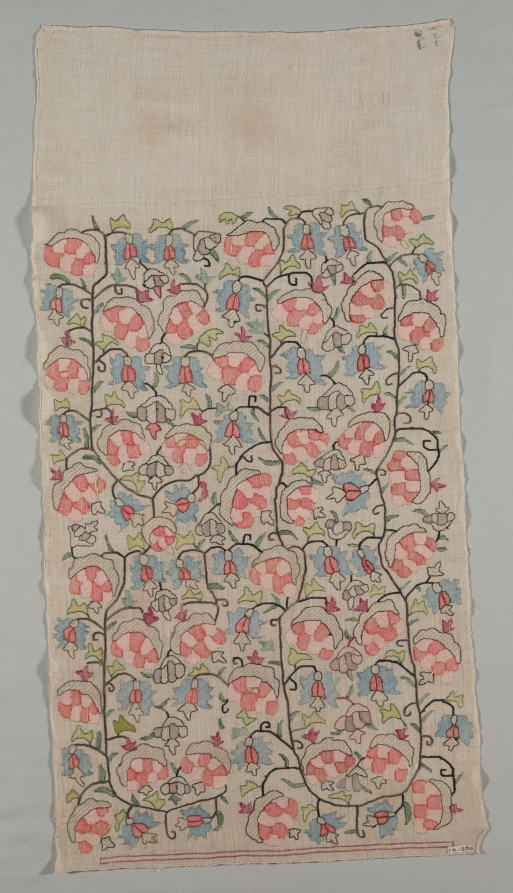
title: Embroidered Cover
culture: Turkey, 19th century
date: 19th century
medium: embroidery: silk and gold filé on linen tabby ground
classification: Embroidery